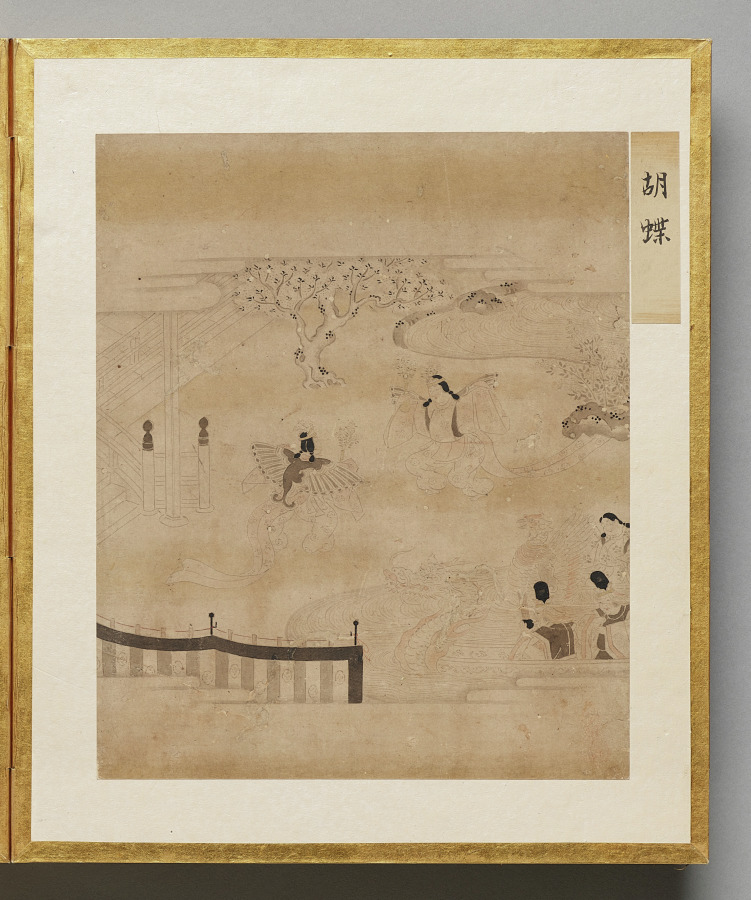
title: Butterflies from Album of Illustrations for the Tale of Genji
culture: Japan, Edo period (1615–1868)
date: 1600s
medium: painting in an accordion-style album; ink, light color, and gold on paper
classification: Bound Volume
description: This album contains illustrations for the classic literary work the Tale of Genji, authored in the 1000s by Murasaki Shikibu, an aristocrat of the Heian period (794–1185) court. The scenes are painted in the “white drawing” (hakubyō) mode, in which a fine ink line is used to depict figures and spaces with great subtlety, punctuated only occasionally by traces of red pigment for a character’s lips, a detail of a garment, or a decorative element. These two scenes illustrate episodes from the chapters “Thin Veil of Cloud” (Usugumo) and “Barrier Gate” (Sekiya).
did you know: The illustrations are identified by chapter title in cartouches to the upper right of the paintings.